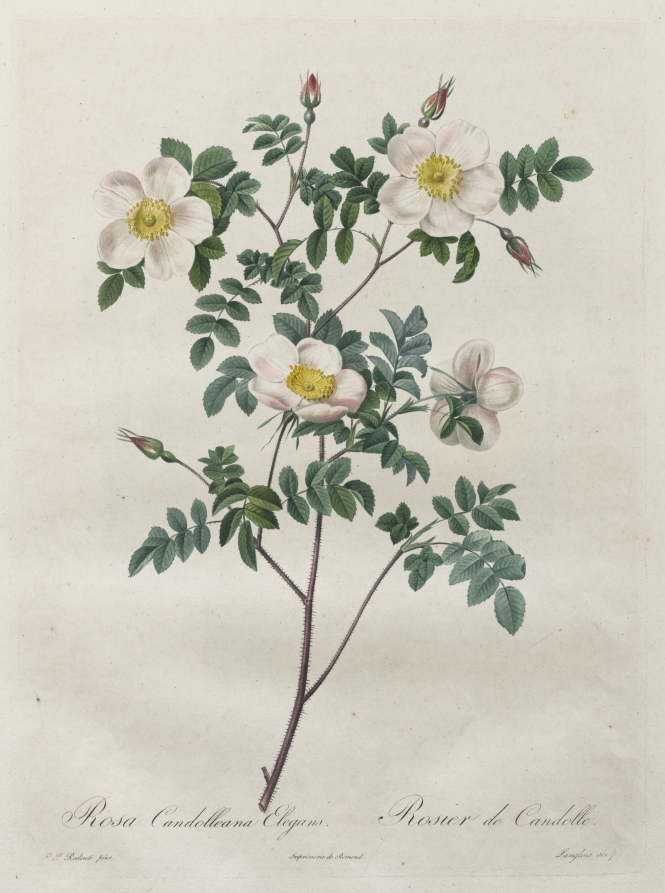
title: Les Roses: Rosa Candolleana Elegans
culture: France, 19th century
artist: Henri Joseph Redouté (French, 1766–1853)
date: 1817–1824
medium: stipple and line engraving, with hand coloring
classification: Print